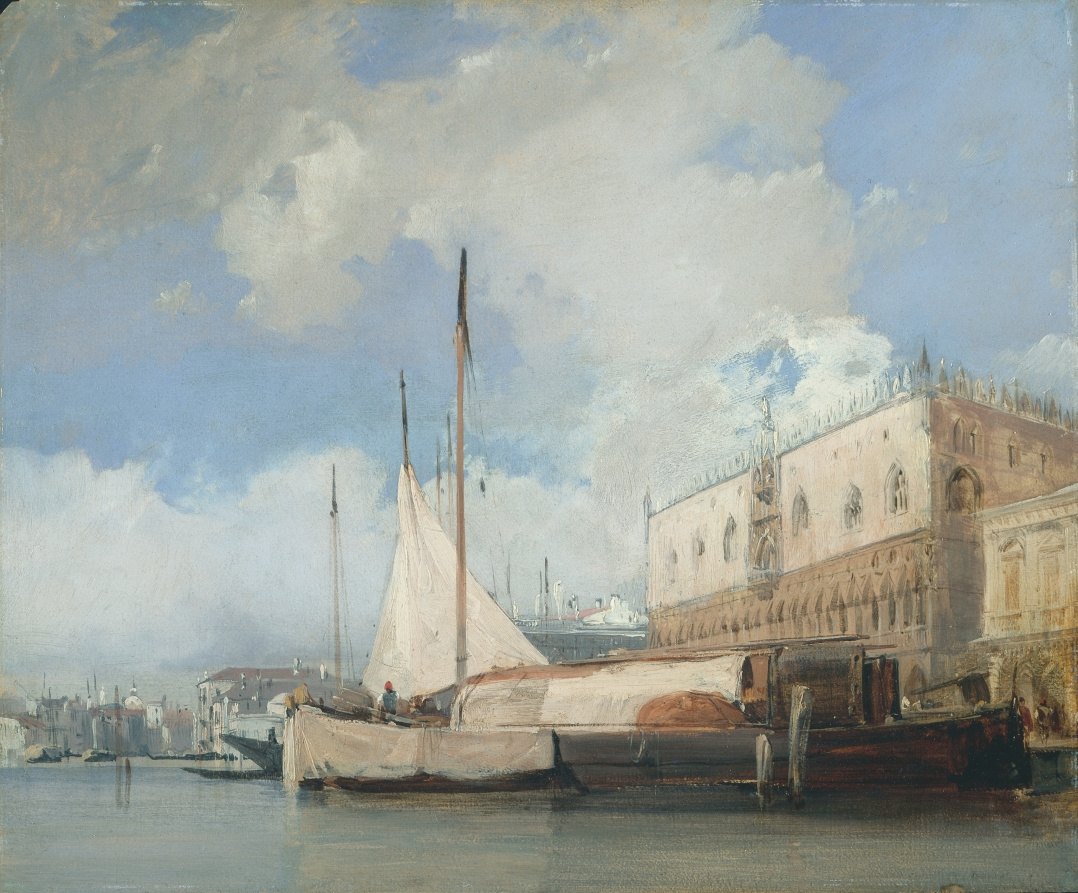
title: The Doge's Palace, Venice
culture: England, 19th century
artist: Richard Parkes Bonington (British, 1802–1828)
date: 1826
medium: oil on millboard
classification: Painting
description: At the age of 22, Bonington achieved overnight success at the official (state sponsored) Paris exhibition known as Salon. Two years later, in 1826, he journeyed to Venice, a city that had long attracted landscape artists. At first, constant rain greatly depressed Bonington, but suddenly the weather changed and Venice was at its glorious best. Bonington frequently painted outdoors, capturing immediate impressions of Venetian architecture and sunlight. He made this particular study from a boat anchored in the lagoon near the Doge's Palace. The thick swirls of paint, with colors mixed together while still wet, indicates how rapidly the artist worked.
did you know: At age seventeen, Bonington began teaching precision drawing at the École des Beaux Arts in Paris and he was essential to bringing aspects of the English style to France.